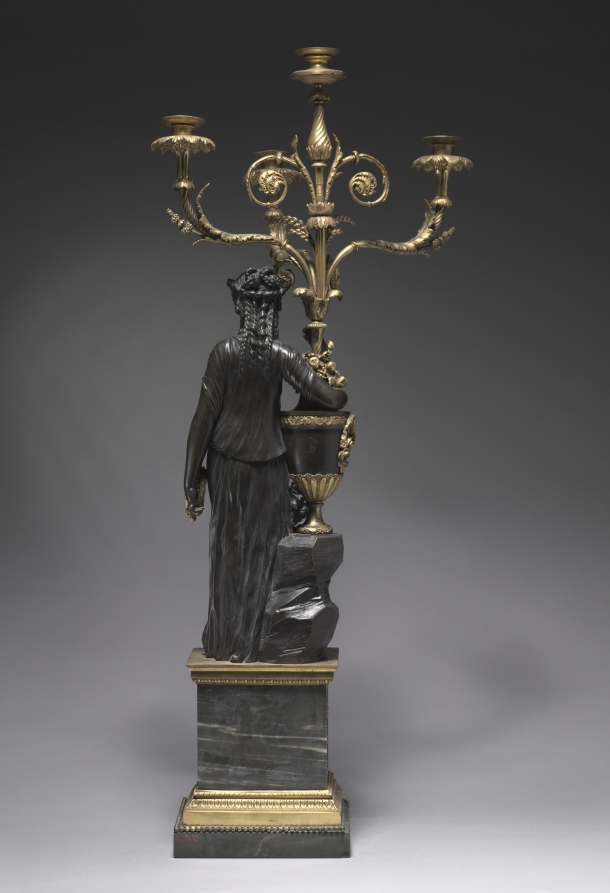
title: Candelabrum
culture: France, 18th century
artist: attributed to Pierre Philippe Thomire (French, 1751–1843)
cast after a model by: Clodion (French, 1738–1814)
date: c. 1780–1785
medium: bronze, gilt bronze, gray marble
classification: Sculpture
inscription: signed behind rock: CLODION.